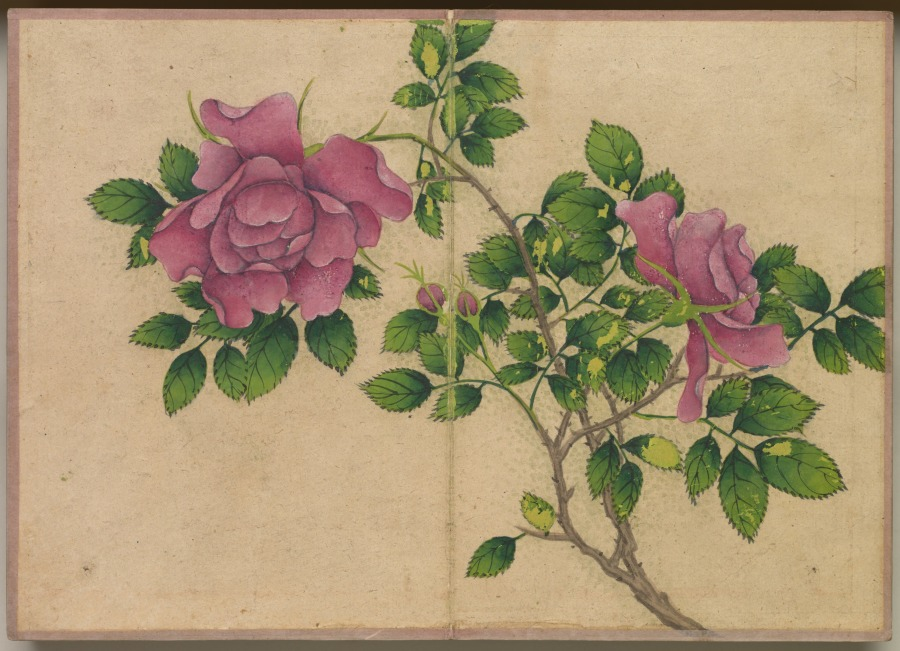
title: Desk Album: Flower and Bird Paintings (Rose)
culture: China, Qing dynasty (1644-1911)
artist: Zhang Ruoai (Chinese, 1713–1746)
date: 1700s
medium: album leaf, ink and color on paper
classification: Painting